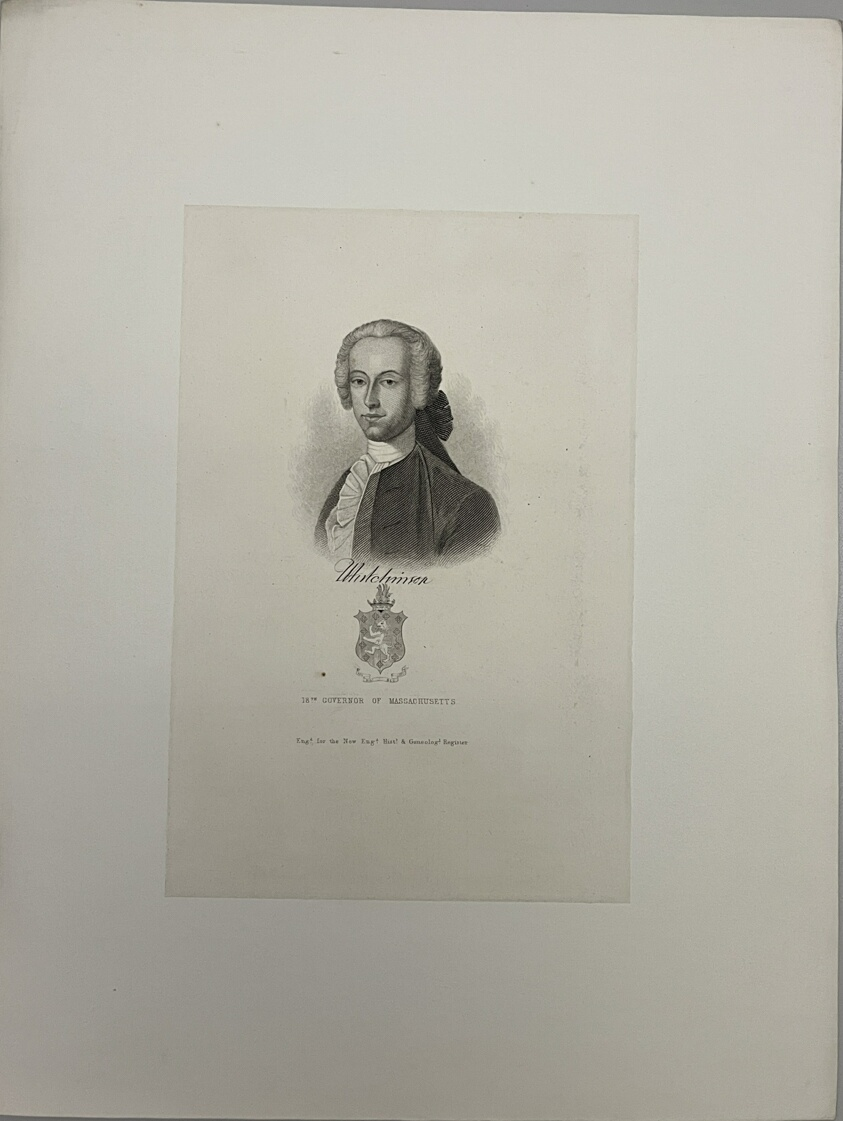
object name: Print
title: Thomas Hutchinson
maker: Artist Unknown (Likely American, 19th century)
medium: Steel engraving on paper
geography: United States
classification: reproduction; print; prints and drawing